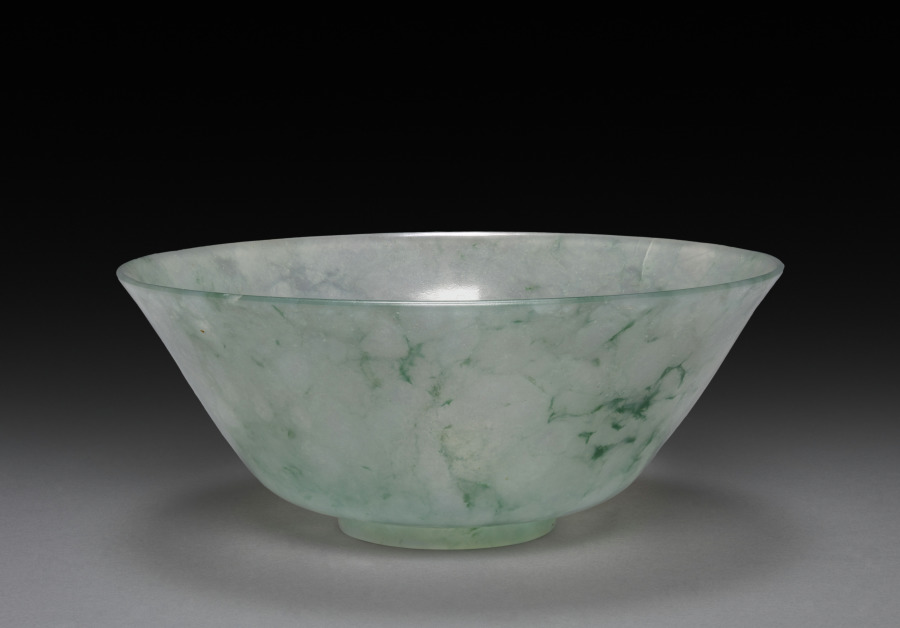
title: Bowl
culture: China, Qing dynasty (1644–1911), Qianlong reign (1736–95)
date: 1736–95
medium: jade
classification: Jade